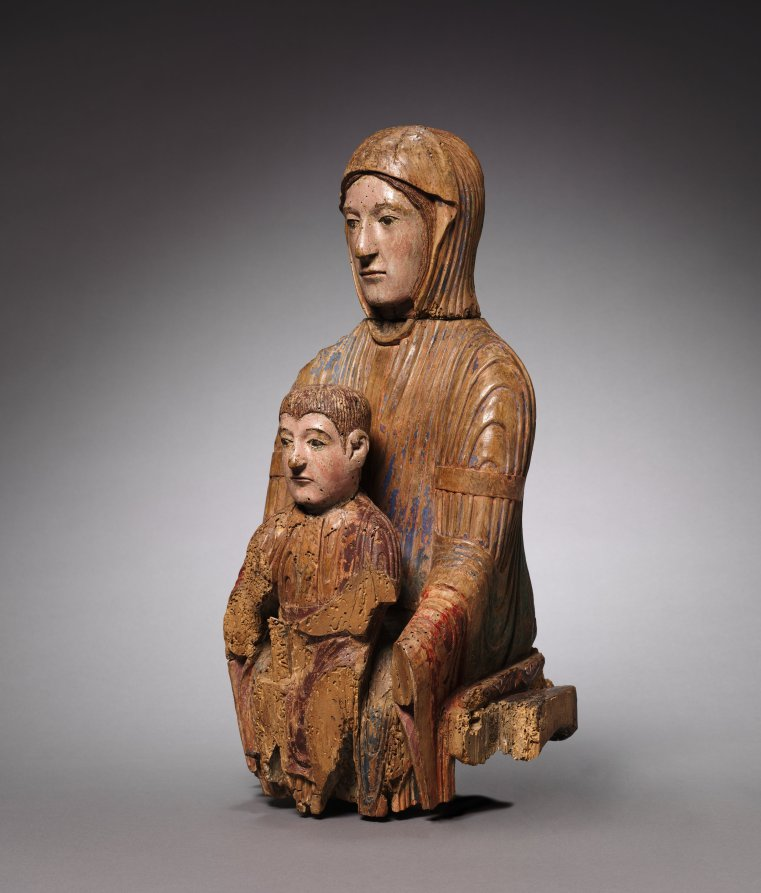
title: Virgin and Child in Majesty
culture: France, Auvergne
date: c. 1150–1200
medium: polychrome wood (walnut)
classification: Sculpture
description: This sculpture belongs to a group of early representations of the Virgin and Child known as the Sedes Sapientiae (the Throne of Wisdom). The subject embodies a complex and core Christian doctrine of the Virgin’s role in the Incarnation (the moment in which Christ became flesh) and ultimately in the redemption of humankind. Mary faces forward, her gaze toward the beholder. As she is seated on a throne, she in turn becomes the throne to the Christ child, thus symbolizing her role in giving birth not only to the human Jesus, but also to the divine Christ. The Incarnation gave Mary a unique role as principal mediator between heaven and earth, and between God and humankind. As a result, her image proliferated in art, especially after the 12th century, a period in which there was surging interest in Mary’s life and increasing devotion to her person and images. The sculpture belongs to a rare group of surviving figures produced in the Auvergne region of central France during the second half of the 12th century. These "Auvergne" Virgins are estimated to number only about 25 or 30 and are characterized by their linear, calligraphic draperies, which form beautiful swirls and contours. All such sculptures are smaller than life-size and made of wood in order to make them mobile. Evidence suggests that they were moved from altar to altar or church to church, and were frequently carried in procession within churches and town streets on Marian feast days. The heads were intentionally removable in order to "dress" them in costumes for such processions.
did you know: In this sculpture of Mary and Jesus, their heads are detachable.